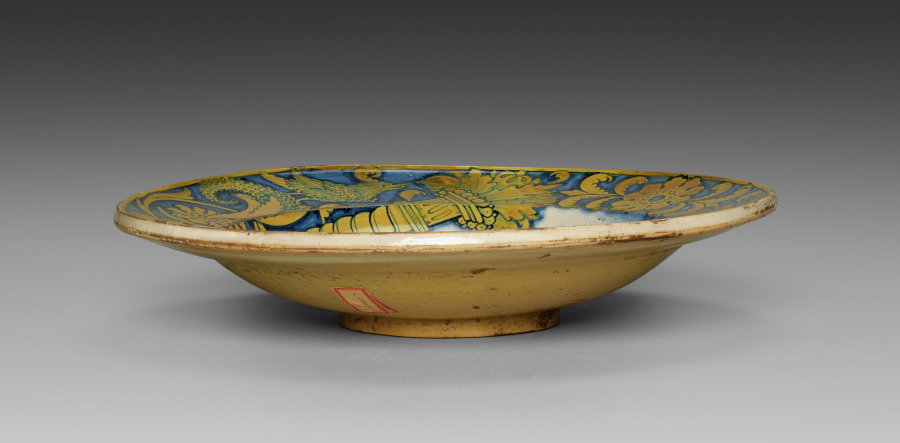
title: Plate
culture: Italy, Deruta, 16th century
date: c. 1520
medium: tin-glazed earthenware (maiolica)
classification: Ceramic